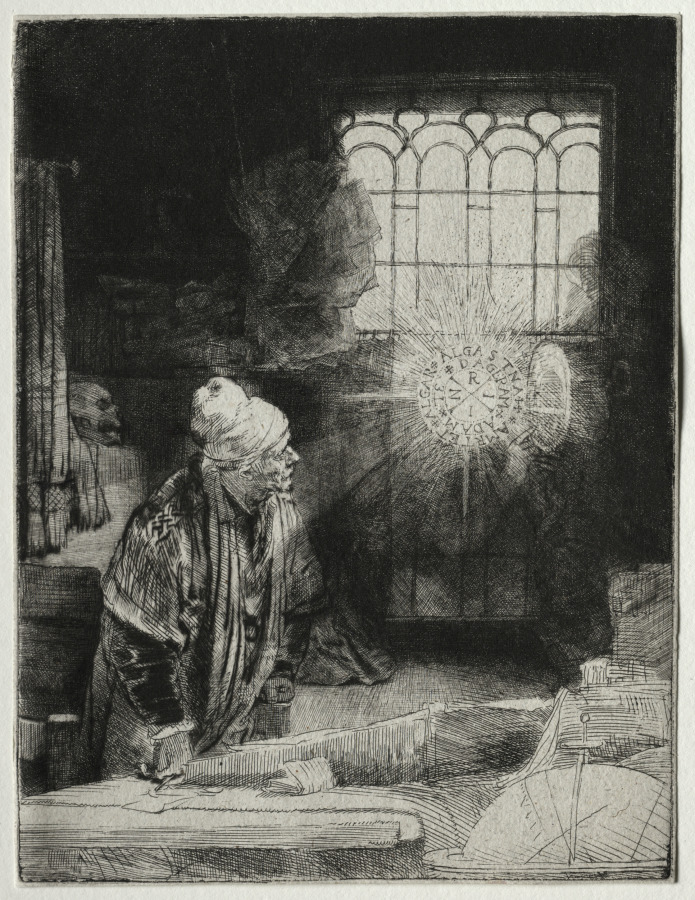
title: Faust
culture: Netherlands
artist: Rembrandt van Rijn (Dutch, 1606–1669)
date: c. 1652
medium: etching and drypoint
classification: Print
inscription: center right, in plate (in concentric circles): +++ARMTET+ALGAR+ALGASTNA [in outer circle] / +ADAM+TE+DAGERAM [in center circle] / INRI [in center] ; VERSO, center, in graphite: N 250 ; lower left, in graphite: N°69 ; lower left, in graphite: 15[I 4C?] ; lower left, in graphite: B270